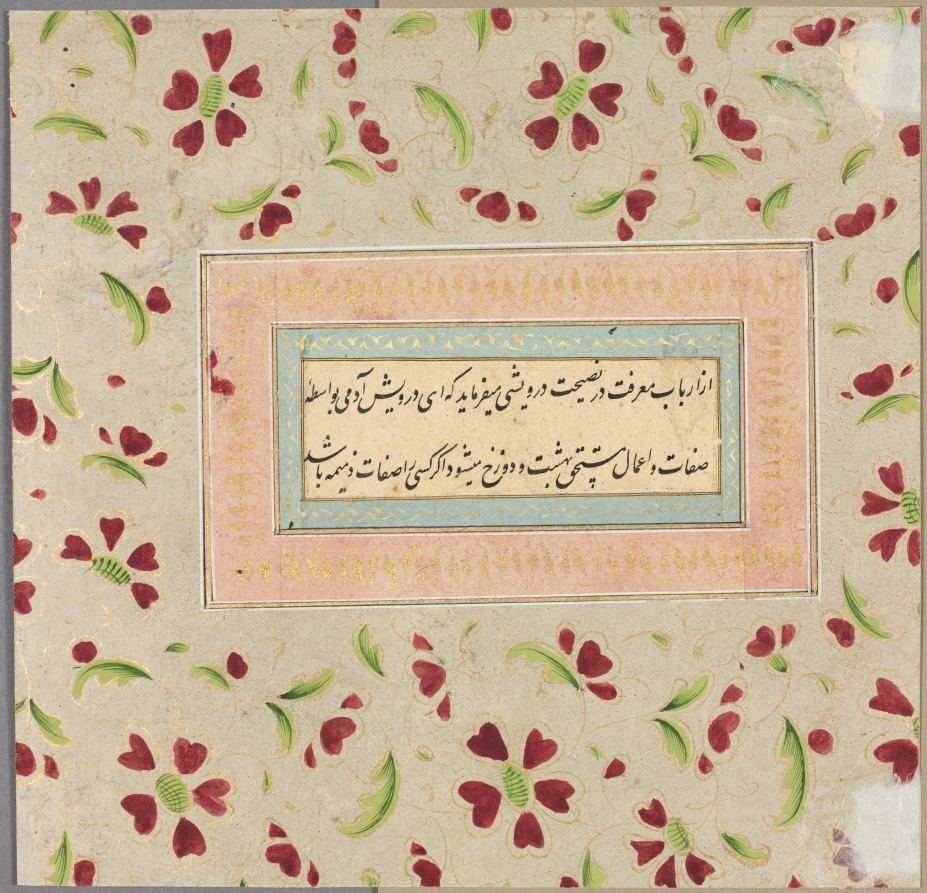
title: Lady after a Bath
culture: India, Mughal, 18th century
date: 1700s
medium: gum tempera and gold on paper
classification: Painting